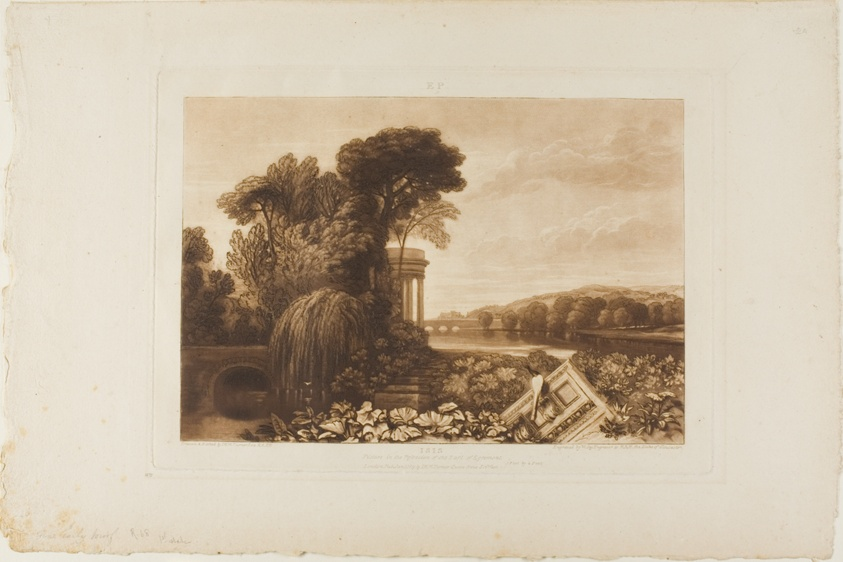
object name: Print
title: Isis, plate 68 from Liber Studiorum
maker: Joseph Mallord William Turner (English, 1775-1851)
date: published January 1, 1819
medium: Etching and engraving in brown on ivory wove paper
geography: England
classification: mezzotint; print; prints and drawing